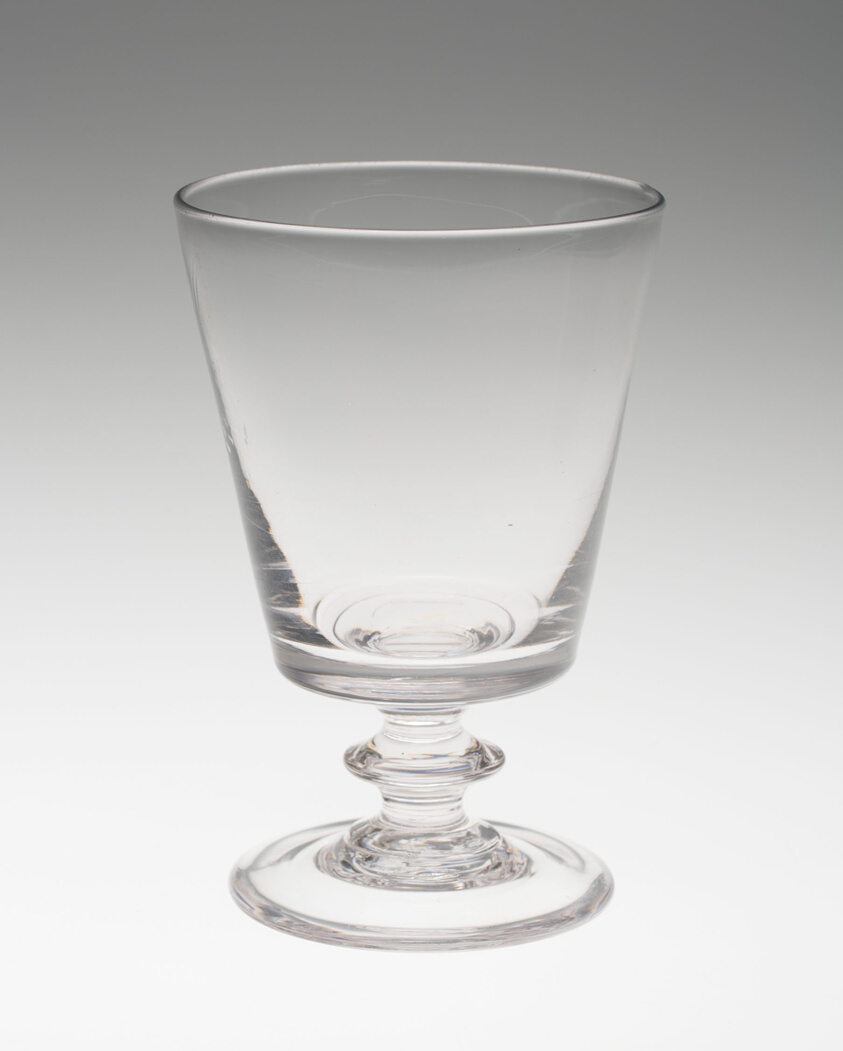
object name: Glass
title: Rummer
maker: England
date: c. 1810/20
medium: Glass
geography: England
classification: glass